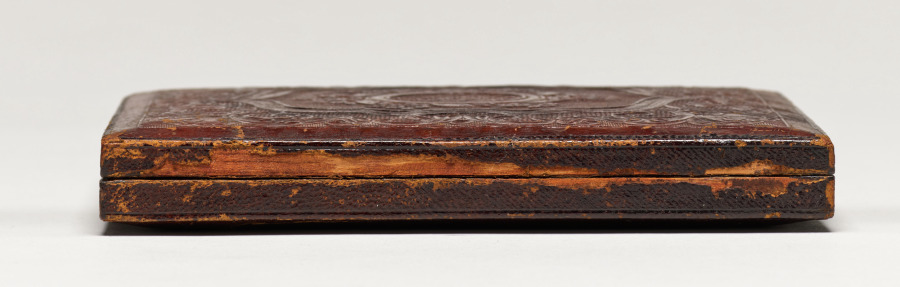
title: St. Anthony Falls from Across the River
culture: America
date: c. 1853–54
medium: daguerreotype, half-plate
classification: Photograph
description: In this image of St. Anthony Falls, the unidentified daguerreotypist made an "instantaneous view" of a remarkable natural wonder, rendering its specific geological formation with exacting clarity. Above a narrow channel where the Mississippi River runs between steep bluffs in Minneapolis, Minnesota, the falls churns away at the bedrock over which it descends. Named by Father Louis Hennepin during his travels in 1680, it is the only significant waterfall on the entire Mississippi River. The specific motivations of the photographer remain unknown. He or she may have wished the photograph to be scientific and documentary, a valuable visual aid for an artist, or just a reminder to a curious resident. No doubt, this daguerreotype was a rare image of the environment's unspoiled condition before the mid 1850s, when demand for an inexpensive energy source irreparably changed this area from a natural to industrial landscape.